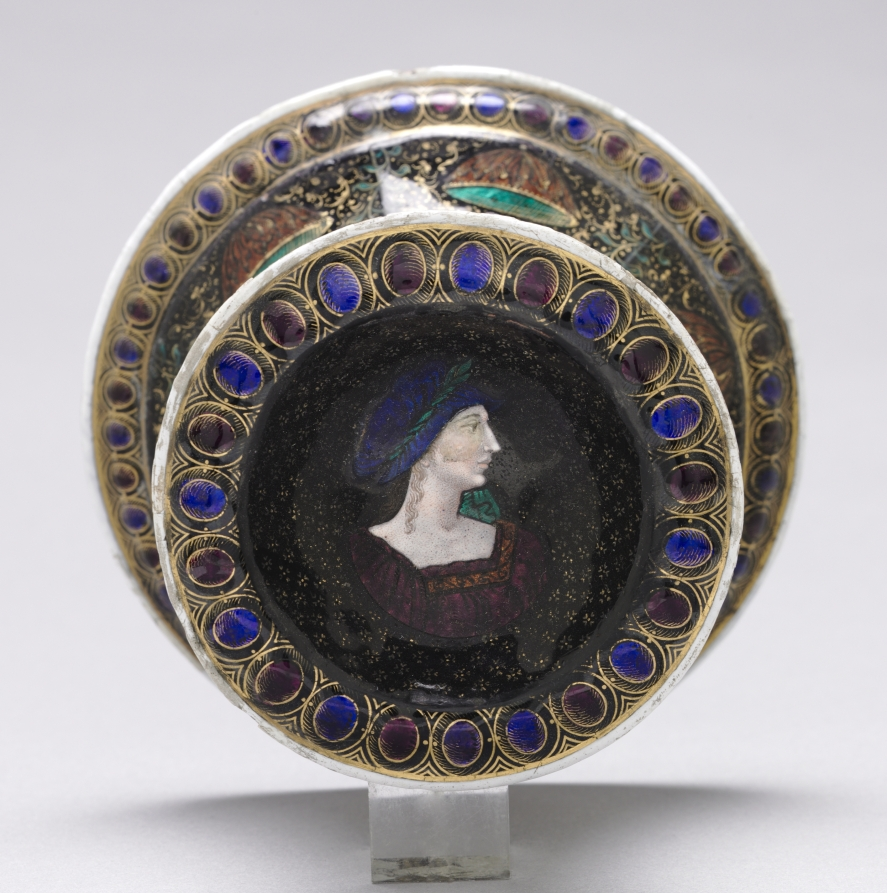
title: Salt Dish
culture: France, Limoges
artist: Jean Limousin (French, 1528–c. 1610)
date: early 1600s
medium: painted enamel on copper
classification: Ceramic